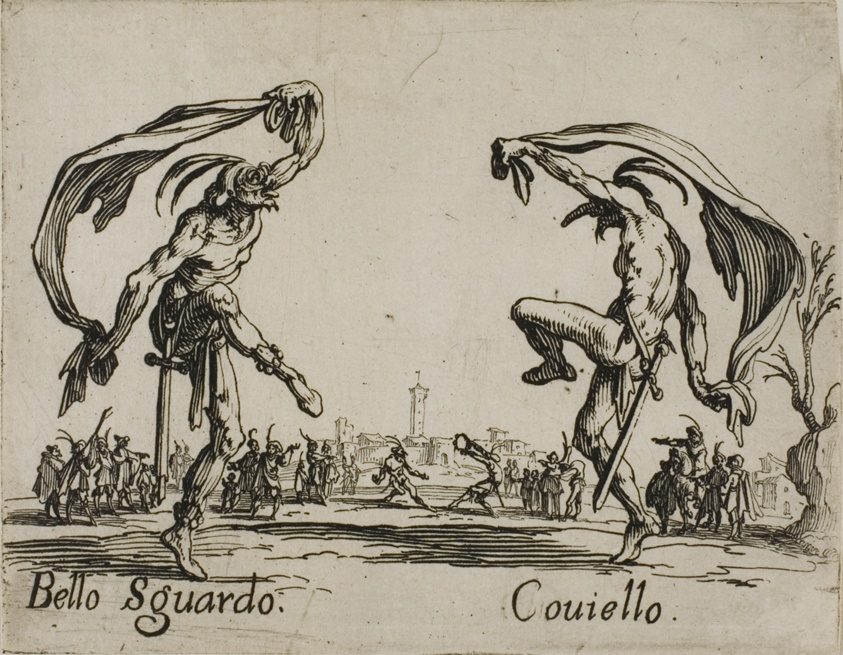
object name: Print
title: Bello Sguardo - Coviello, plate 18 from Balli di Sfessania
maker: Jacques Callot (French, 1592-1635)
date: c. 1622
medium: Etching and engraving on paper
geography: France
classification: etching; print; prints and drawing